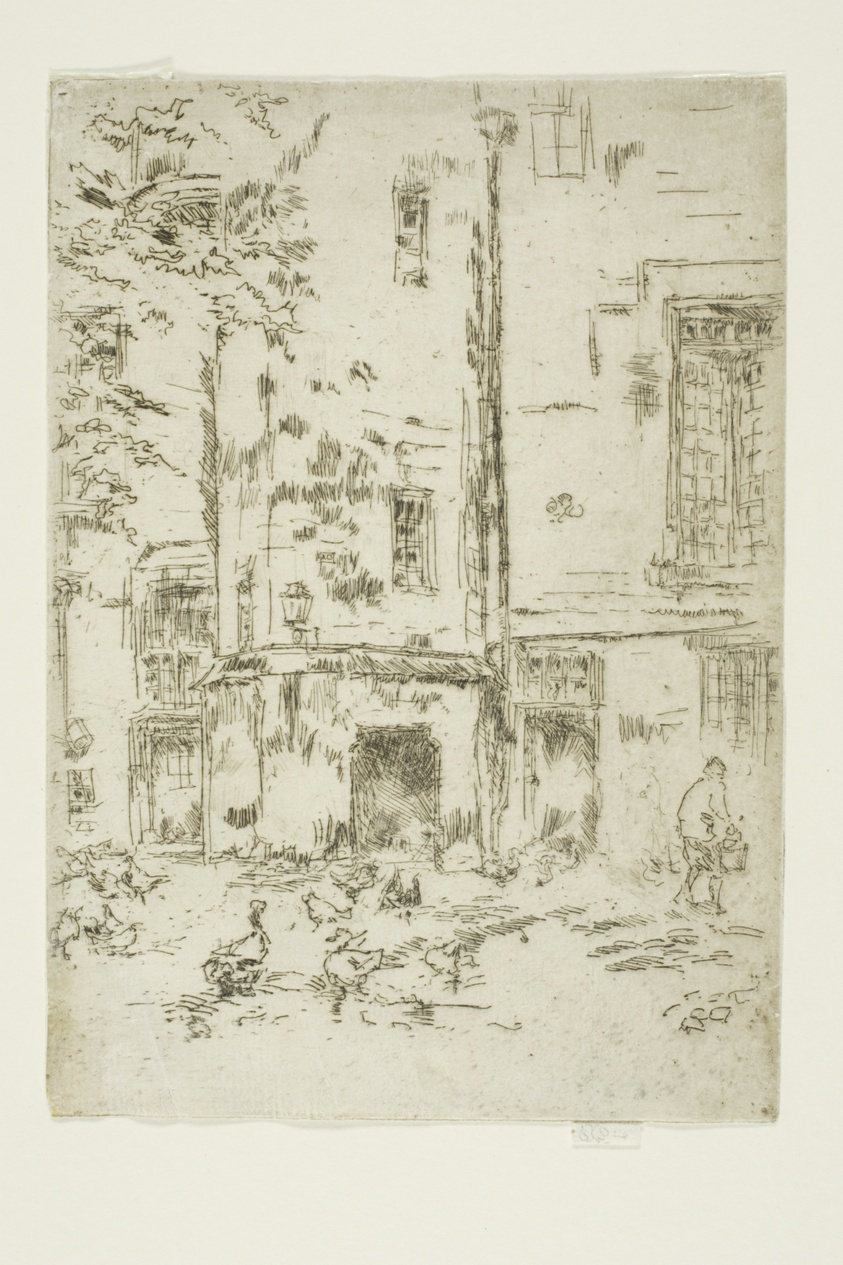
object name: Print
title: Hôtel de la Croix Blanche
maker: James McNeill Whistler (American, 1834-1903)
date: 1888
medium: Etching with foul biting in black ink on ivory laid paper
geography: United States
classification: etching; foul biting; print; prints and drawing; paper